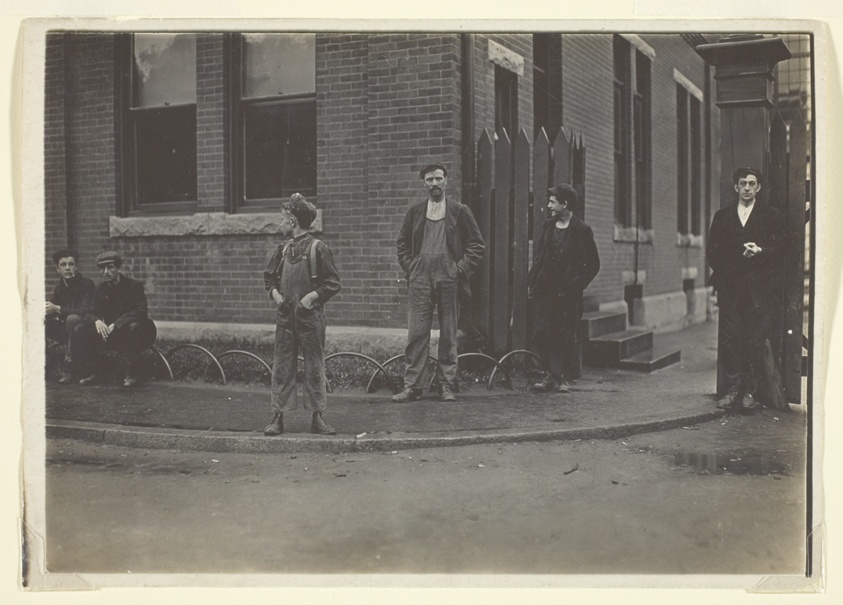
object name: Photograph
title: Warren, Rhode Island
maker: Lewis Wickes Hine (American, 1874–1940)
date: 1909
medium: Gelatin silver print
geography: United States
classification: gelatin silver (developing-out-paper) pr; photographic process; photography; photograph